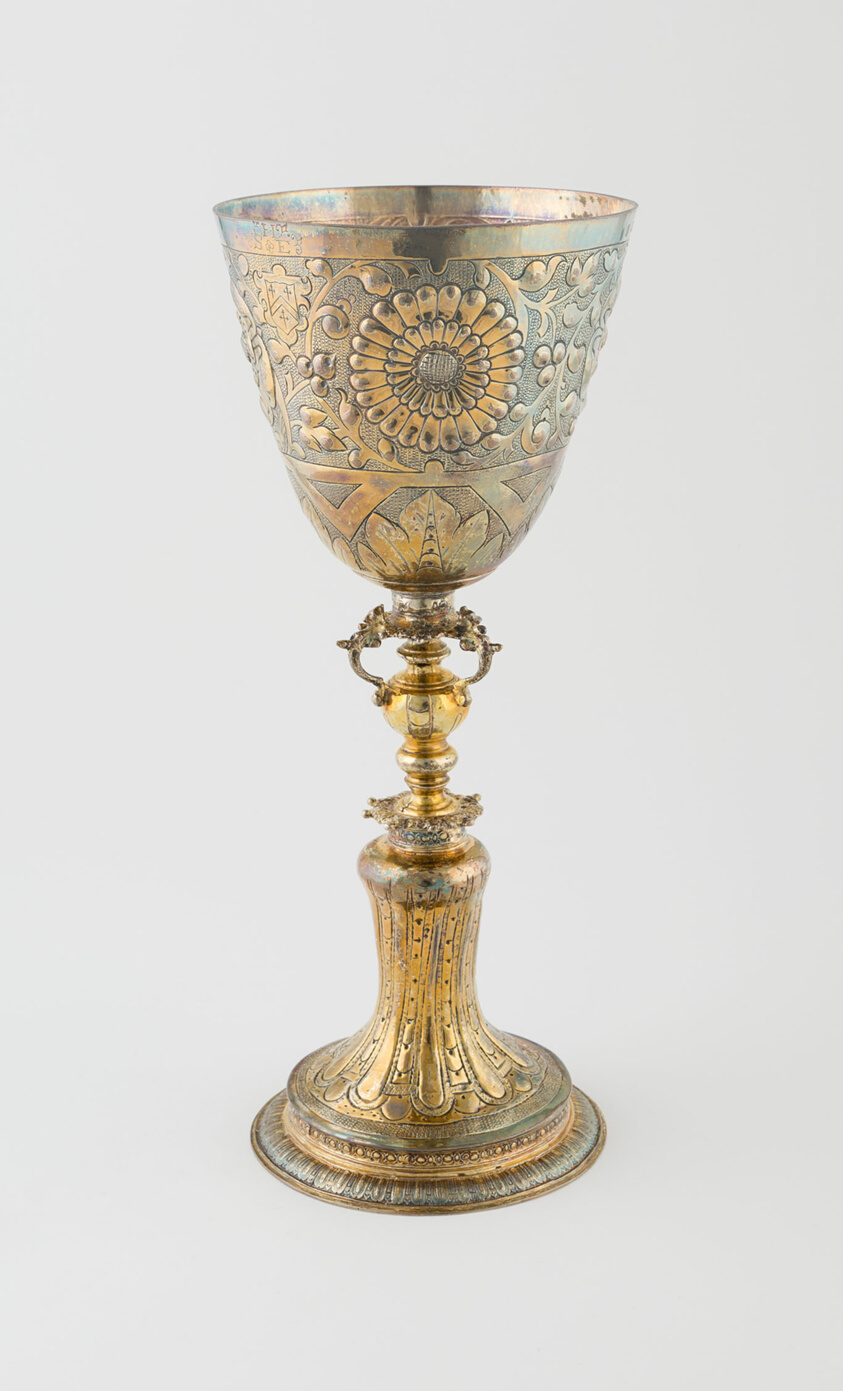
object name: Metalwork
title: Standing Cup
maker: Marked AB; London, England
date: 1607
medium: Silver gilt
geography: London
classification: drinking vessel; silver; metalwork; european decorative arts